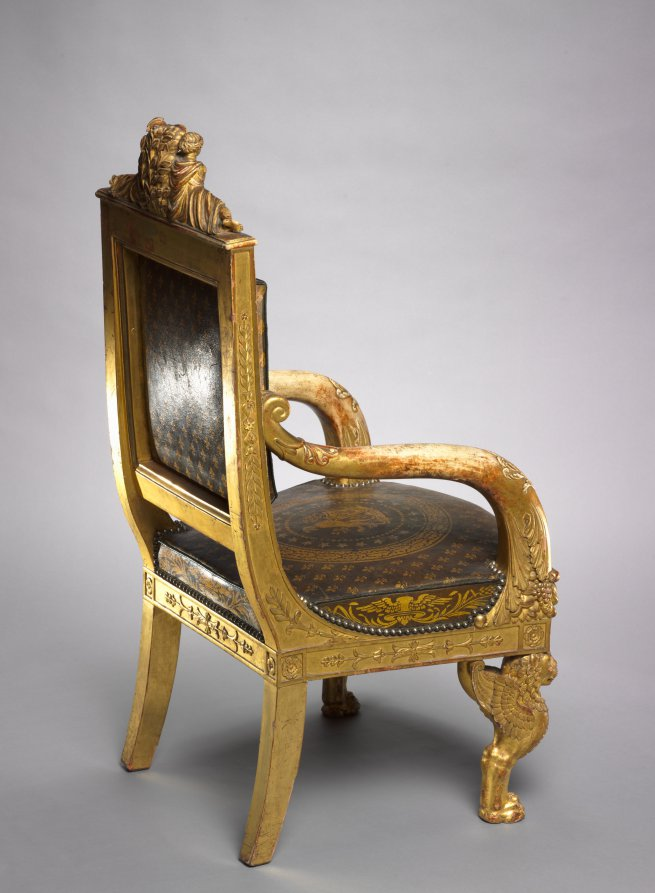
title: Child's Throne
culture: France, Paris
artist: Pierre-Marie Balny le Jeune (French, 1832)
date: 1822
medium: carved and gilded wood, leather upholstery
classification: Furniture and woodwork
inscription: inscribed with stencils inside back rail: BLONDEL TAPISSIER/RUE ST. ANTOINE N 72 1822 inscribed in ink lower edge back rail: 12 JANVIER 18[22?]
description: This chair was made for the young, presumed successor to the French throne who ruled briefly as Henri V in 1830, the last of the direct Bourbon line. He is depicted at the center of the top rail protected by female figures representing France and Minerva, the Roman goddess of wisdom. Fleurs-de-lis and the Gallic rooster, symbols of French royalty and the French people, decorate the upholstery.